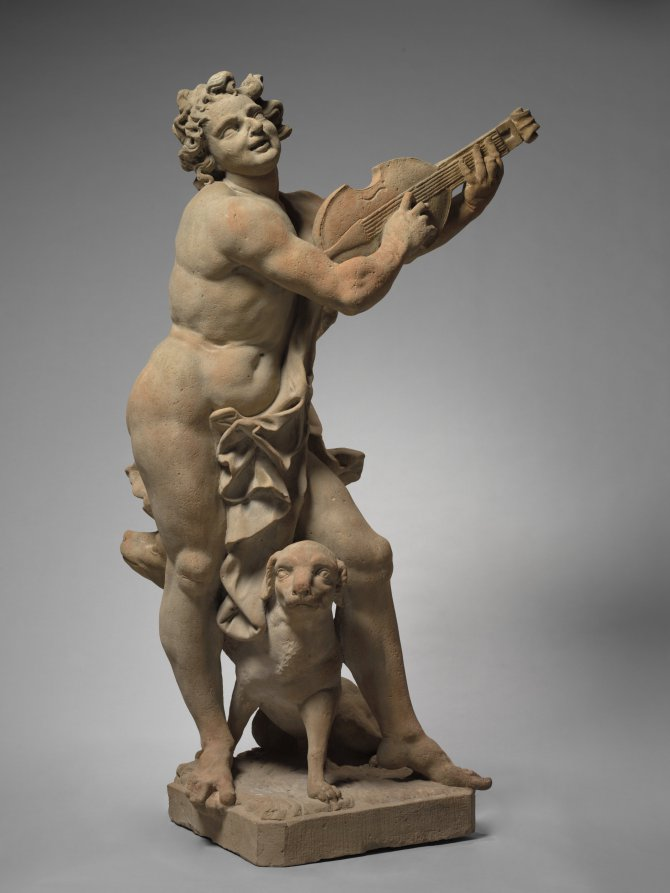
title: Orpheus and Cerberus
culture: Germany, near Bamberg, 18th century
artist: Ferdinand Tietz (Austrian, 1708–1777)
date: c. 1765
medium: sandstone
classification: Sculpture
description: This work was one of numerous sculptures Tietz created for the gardens of Schloss Seehof, near Bamberg in Bavaria (Germany), the summer residence of the Prince Bishops of Bamberg. The exaggerated forms of Orpheus's face and musculature caricature the idealized proportions of classical sculpture. A further parody exists with his companion: the usually terrifying hound Cerberus is here nothing more than a docile puppy, sitting calmly at Orpheus's feet. Meant to be viewed outdoors, on a high pedestal and from a distance, this work is less finely detailed than sculptures Tietz made for indoor settings at Seehof.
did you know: Taught to play the lyre by the Greek god Apollo, Orpheus's legendary musical abilities had the power to charm animals.